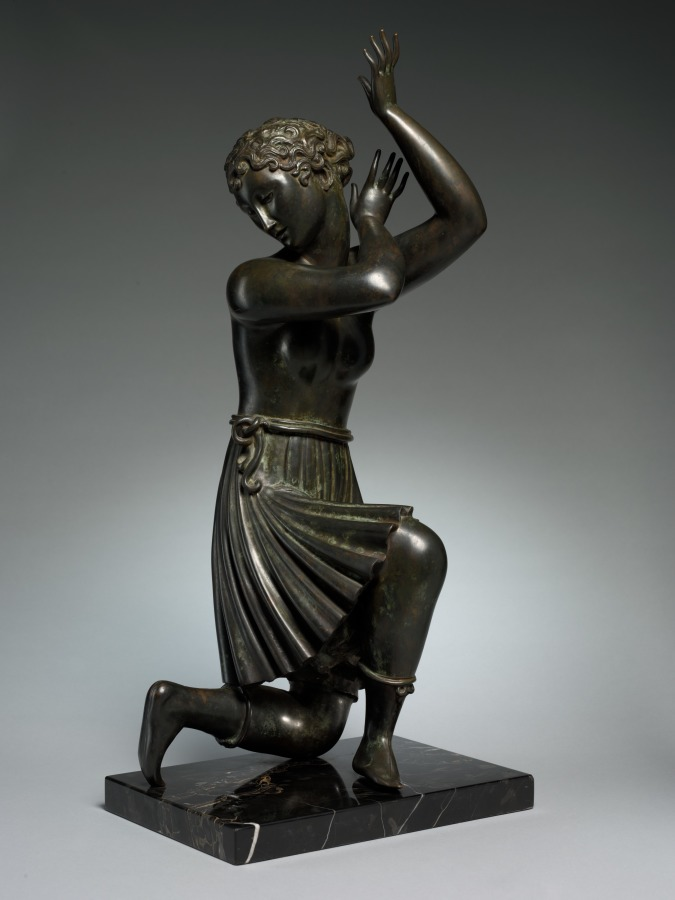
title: Dancing Figure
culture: America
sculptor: Elie Nadelman (American, born Russian Empire [now Poland], 1882–1946)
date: 1916–18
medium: bronze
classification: Sculpture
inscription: Signed: Elie Nadelman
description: Dancing Figure displays the geometrically simplified forms and softened angles that are a hallmark of Elie Nadelman’s work. Its spiraling composition presents a woman whose body partially twists on bended knee. Her raised arms echo the position of her legs.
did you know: A larger version of this sculpture was originally conceived in limestone to decorate an outdoor garden in Long Island.